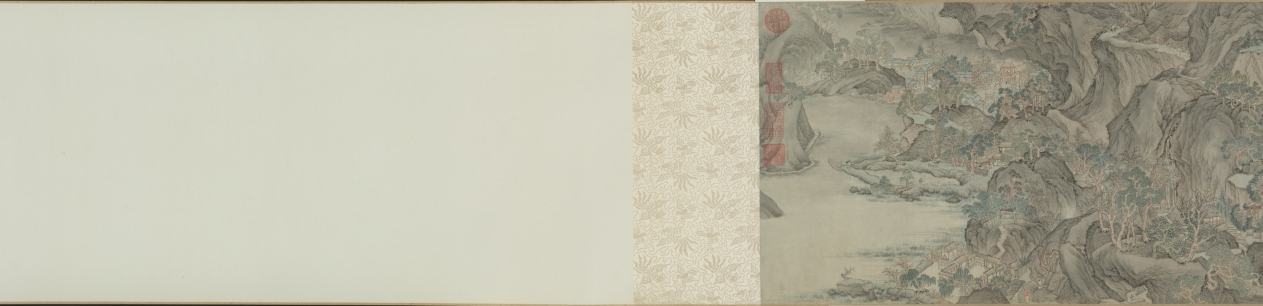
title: Greeting the Spring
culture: China, Ming dynasty (1368–1644)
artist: Wu Bin (Chinese, active c. 1591–1626)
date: 1600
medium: handscroll; ink and light color on paper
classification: Painting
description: This masterfully composed landscape in light colors and delicate brushwork is an image of the water-rich Jiangnan region in southeast China, where Wu Bin was active as an artist. Embedded in rolling hills along lakesides and streams nestle cityscapes hosting numerous spring festivities. Lantern displays and street performances in the villages salute the New Year, and are interwoven with scenes of farming, fishing, and silk making. In one scene in the middle ground, an ox made of clay under a canopy is lead in a procession to an architectural compound, a ceremony known as whipping the spring ox in hope for a good harvest. This handscroll bears five collector seals by the Qianlong emperor indicating his appreciation for the painting.